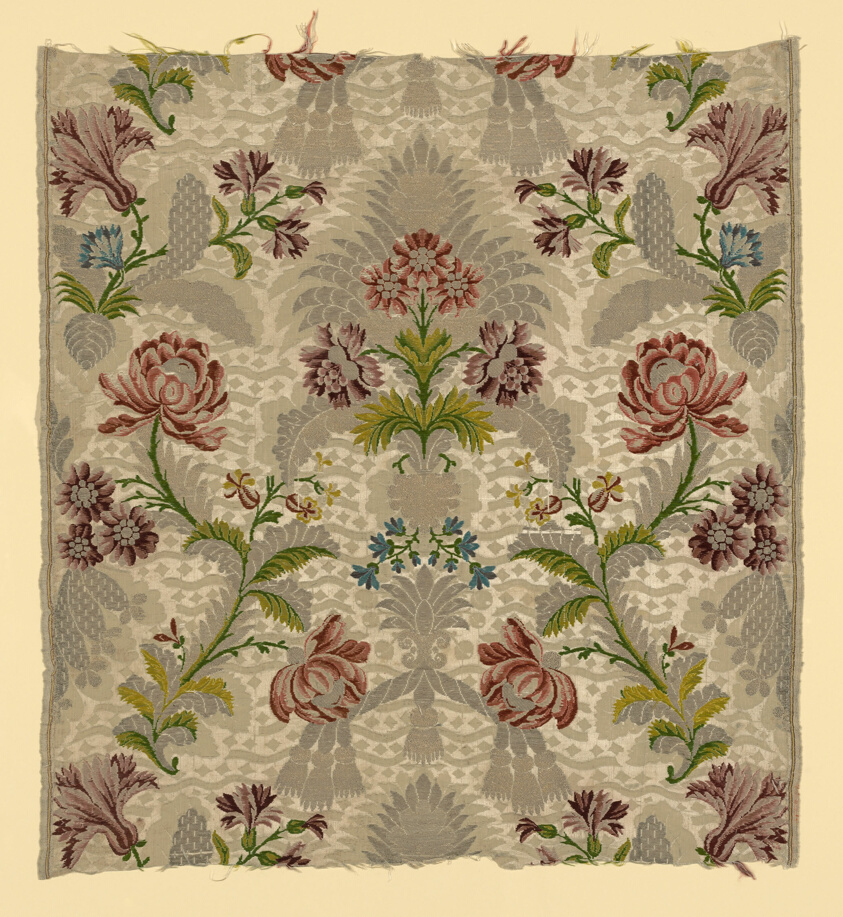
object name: Textile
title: Panel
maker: France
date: 1725/75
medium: Silk, damask weave with areas of brocading in silk and gilt strip wound around a silk fiber core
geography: France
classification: textile; weaving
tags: flowers, tassels